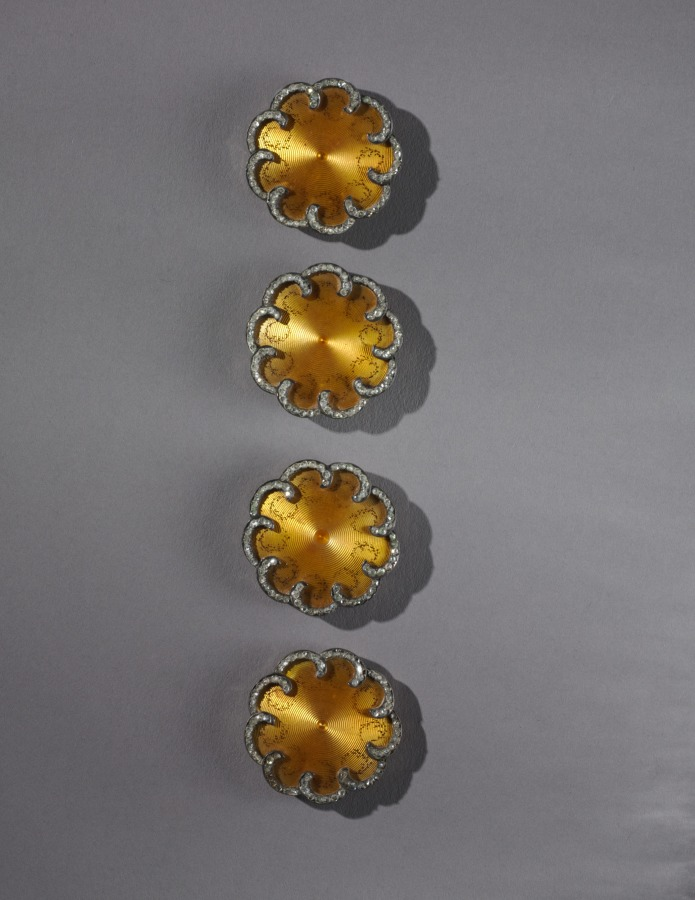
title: Buttons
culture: Russia, St. Petersburg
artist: firm of Peter Carl Fabergé (Russian, 1846–1920)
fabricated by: August Wilhelm Holmström (Russian, 1929–1903)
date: after 1896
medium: gold, enamel, diamonds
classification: Miscellaneous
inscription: inscribed: double-headed eagle; Fabergé; St. Petersburg, Moscow (all in Cyrillic; inside lid of box).